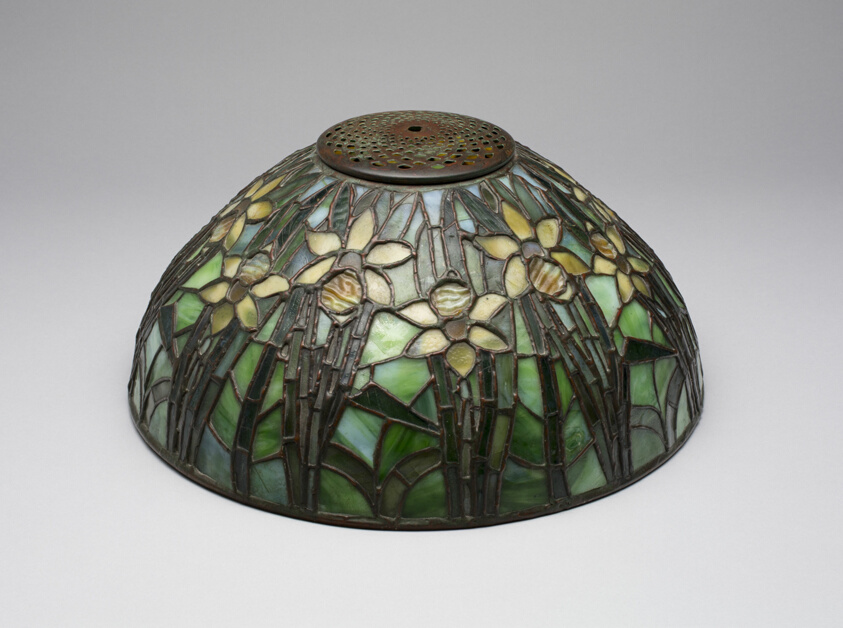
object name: Glass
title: Lamp (shade)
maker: Designed by George Prentiss Kendrick (American, 1850-1919); Tiffany Glass and Decorating Company (American, 1894–1902); or Tiffany Studios (American, 1902–32); Corona, New York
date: 1899–1909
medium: Leaded glass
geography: New York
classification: lampshade; american decorative arts; decorative arts